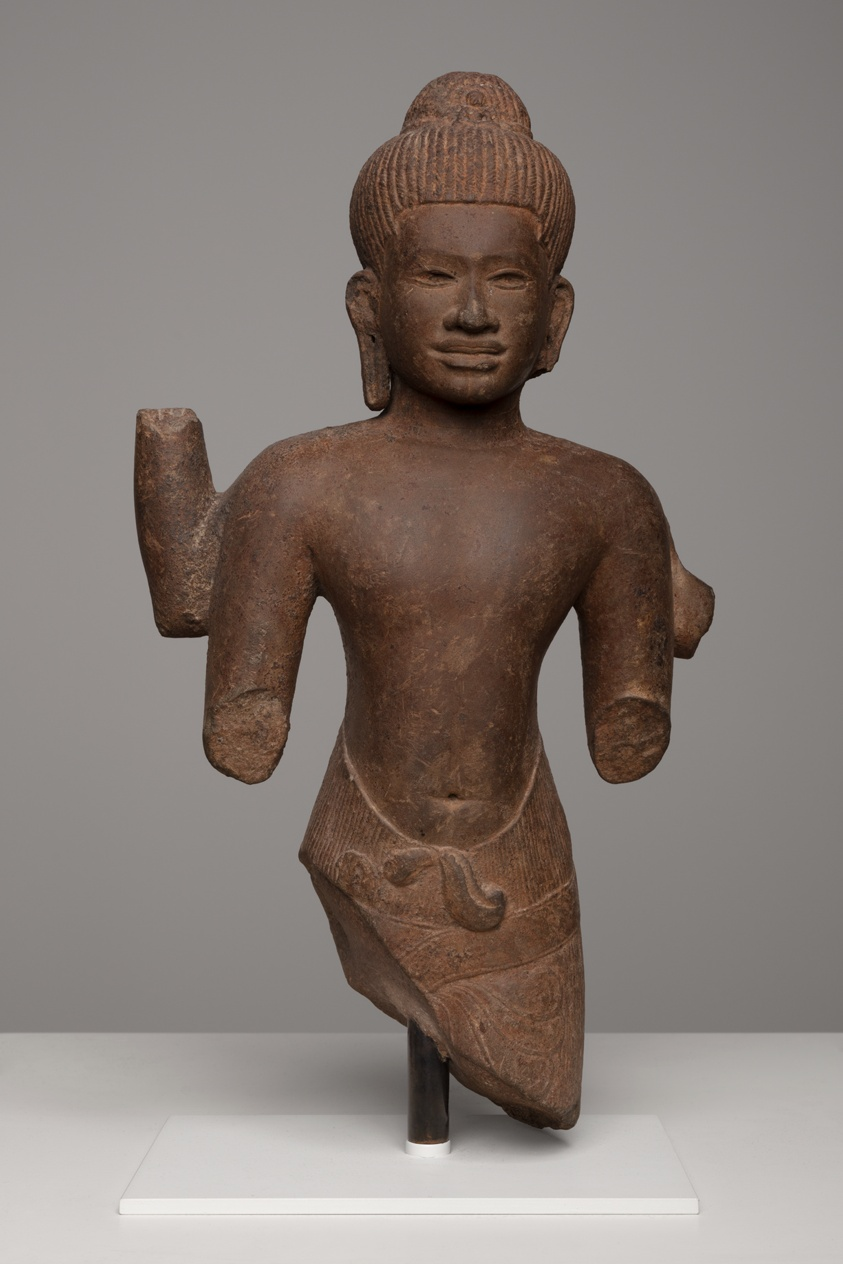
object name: Sculpture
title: Bodhisattva Avalokiteshvara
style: Southeast Asian, baphuon, angkor thom, angkorean, cambodian, asian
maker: Thailand or Cambodia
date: Angkor period, 11th century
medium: Sandstone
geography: Cambodia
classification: sandstone; stone; sculpture; asian art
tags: religion, bodhisattva, Buddhism